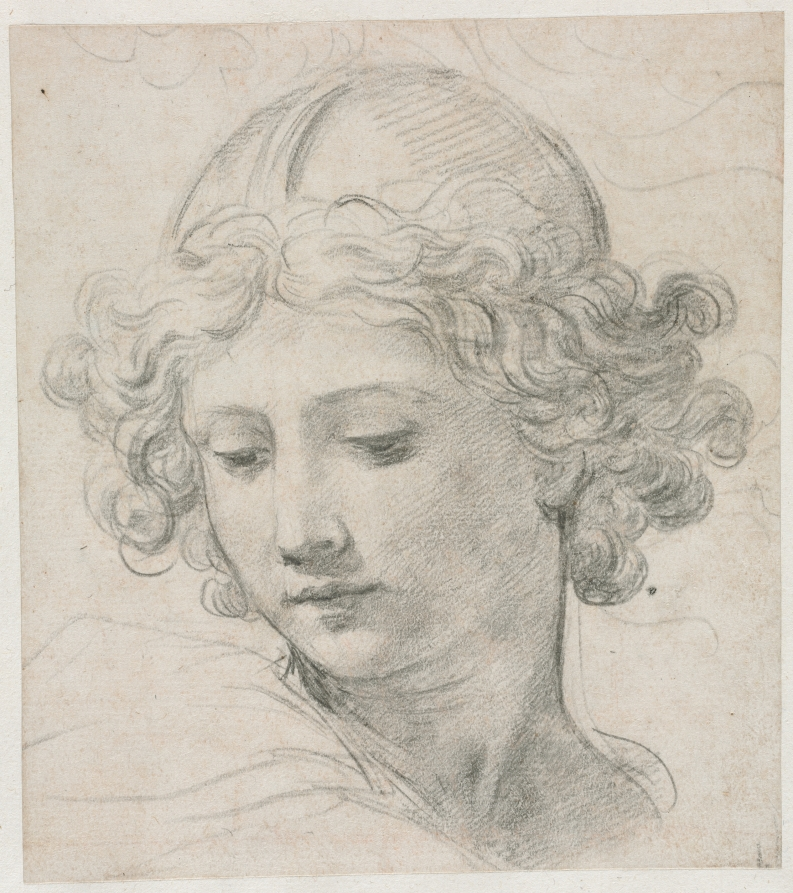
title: Study for the Head of St. Michael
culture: Italy, 17th century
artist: Pietro da Cortona (Italian, 1596–1669)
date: 1633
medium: black chalk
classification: Drawing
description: Pietro da Cortona drew this angelically beautiful face in a style reminiscent of the work of Renaissance master Raphael (1483–1520). Cortona's use of black chalk to develop extremely subtle effects of shading shows the technique at its most refined. He drew this sheet in preparation for a ceiling decoration, Saint Michael and Angels with the Instruments of the Passion, painted in fresco in the church of Santa Maria in Vallicella (better known as the Chiesa Nuova, or "New Church") in Rome, completed in 1633.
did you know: The fresco for which this drawing was made as a preparatory study joins works of art by Peter Paul Rubens as well as relics of the Saint Philip Neri in the Chiesa Nuova in Rome.